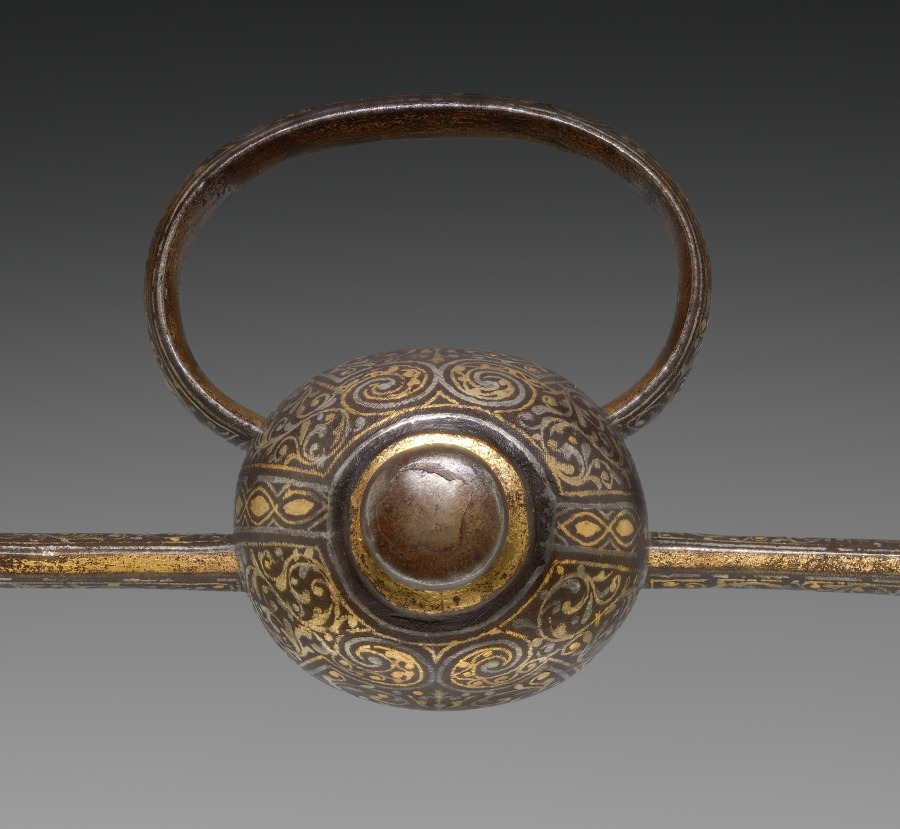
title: Hanger (Hunting Sword)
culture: Hilt: Italy (?); Blade: Germany, Saxony, late 16th-17th Century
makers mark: Jaspar Bongen the Younger (German, active late 1600s)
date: late 1600s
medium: steel; gold and silver damascened hilt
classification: Arms and Armor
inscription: "1553" (Presumed to be a commemorative date)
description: Damascening, the technique of hammering gold and silver wires into grooves cut to receive them, enlivens this sword's hilt. Further texture was added with wires to improve the user's grip, which allowed him to hunt with more control and accuracy. Hunting was a popular sport among the wealthy and many nobles owned tracts of forest, but peasants were prohibited from hunting on these lands.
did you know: The swordsmith's mark, a crowned stag visible on the blade below the hilt, is unidentified.